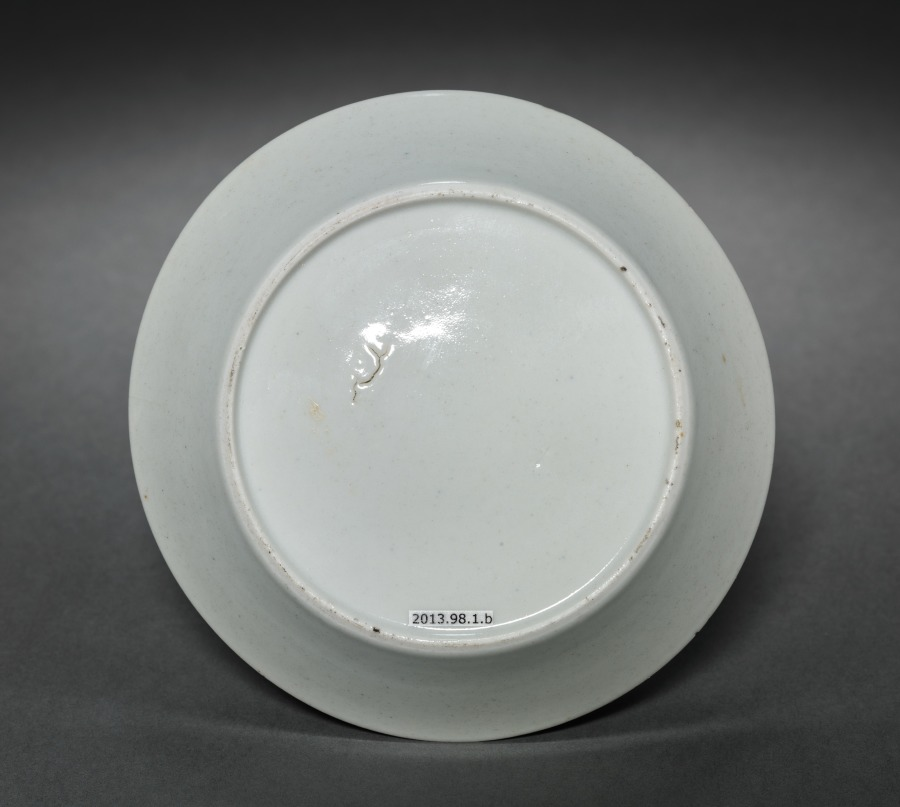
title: Saucer from Oliver Wolcott, Jr. Tea Service (1 of 6)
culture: Chinese Export porcelain, late 18th-early 19th century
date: 1785–1805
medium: porcelain, sepia enamel, gold leaf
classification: Ceramic